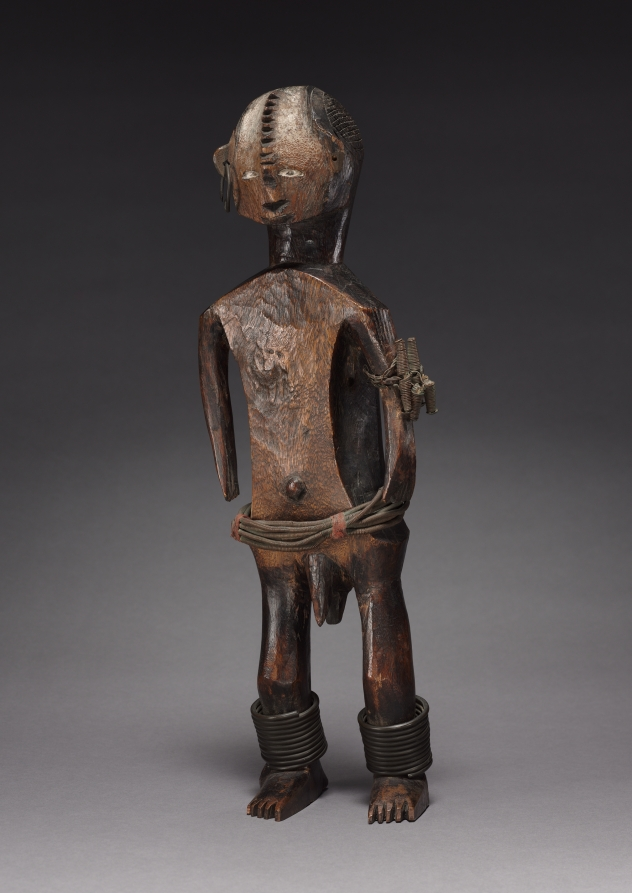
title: Male Figure of a Pair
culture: Africa, Central Africa, Democratic Republic of Congo, probably Ngbandi-style carver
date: late 1800s-early 1900s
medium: Wood, iron alloy, copper alloy, and cloth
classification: Sculpture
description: Carving of paired figures is quite well documented among the Ngbandi and its neighbors the Ngbaka-Minagende, where such sculptures are said to represent the mythical ancestor Seto and his sister-wife, Nabo. Field-based research cannot confirm the existence of figurative couples among the Ngbandi.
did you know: Odette Delenne, the collector of this pair, once stated that these figures reminded her of herself and her husband, René.